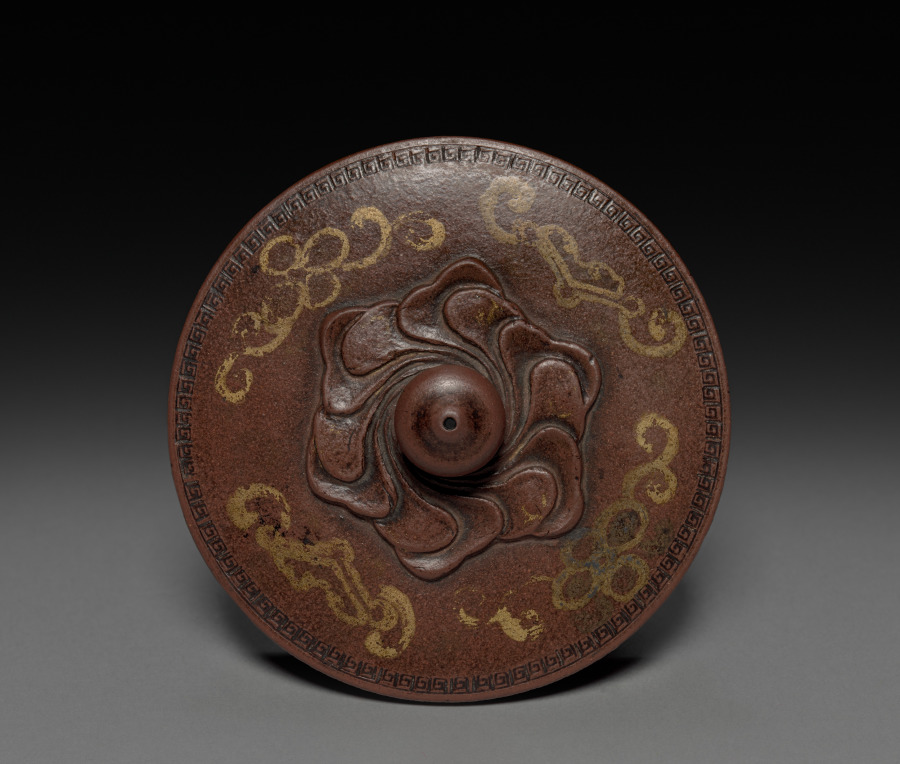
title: Teapot with Landscape and Imperial Poem (lid)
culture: China, Jiangsu province, Yixing, Qing dynasty (1644–1911), Qianlong reign (1736–95)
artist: Chen Hanwen (Chinese, active c. 1720s–90s)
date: 1762–95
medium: Stoneware, with gold pigment, Yixing ware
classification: Ceramic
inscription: 陳漢文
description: This teapot with a polished surface shows an imperial poem in gold on one side and a landscape on the other. The poem in archaic seal script was composed by the Qianlong emperor on his third southern inspection tour in 1762, when he traveled to southern China to solidify his rule. The base bears a stamped seal of its maker. Yixing potters produced teapots primarily for Ming dynasty literati-officials who valued simplicity and restraint, until the early Qing emperors introduced them at court.